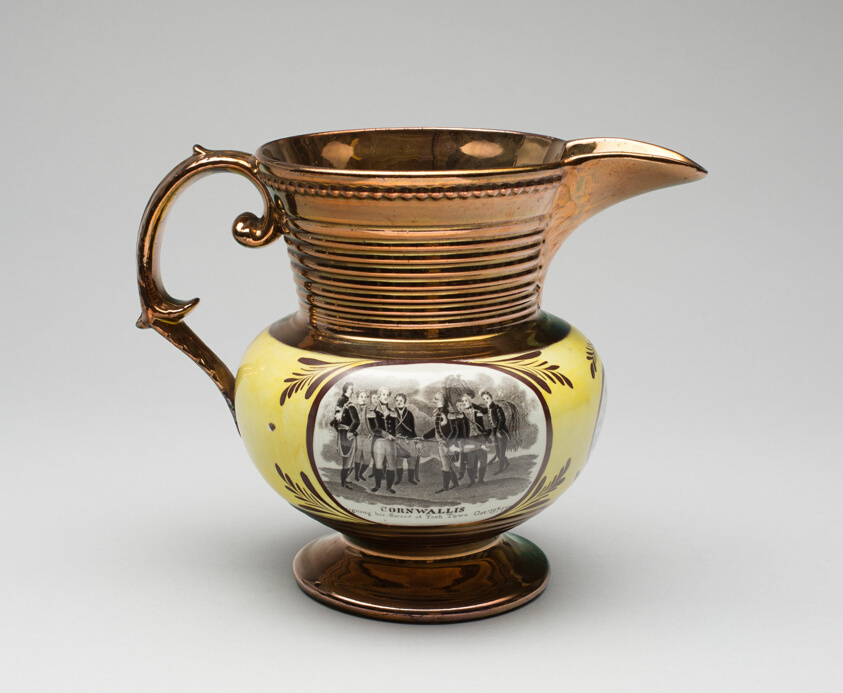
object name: Decorative Arts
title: Pitcher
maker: England; English for the American market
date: c. 1850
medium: Earthenware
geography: England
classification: pitcher (vessel); earthenware; vessel; american decorative arts; ceramics; decorative arts